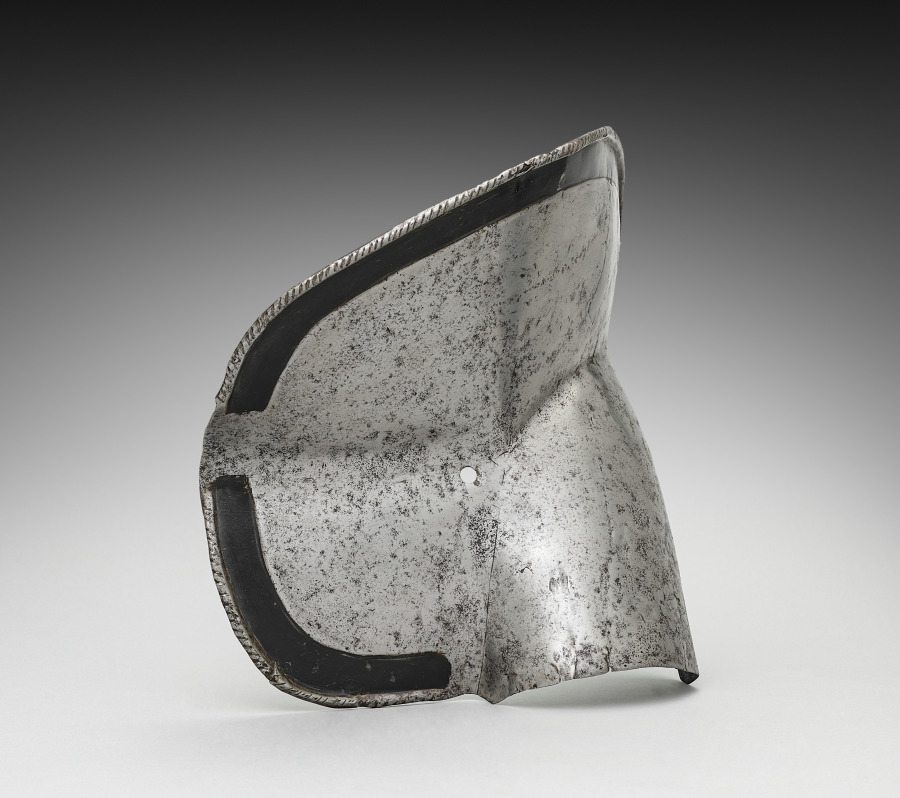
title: Gardbrace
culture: Germany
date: c.1550–1570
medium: iron, steel, leather and brass rivets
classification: Arms and Armor